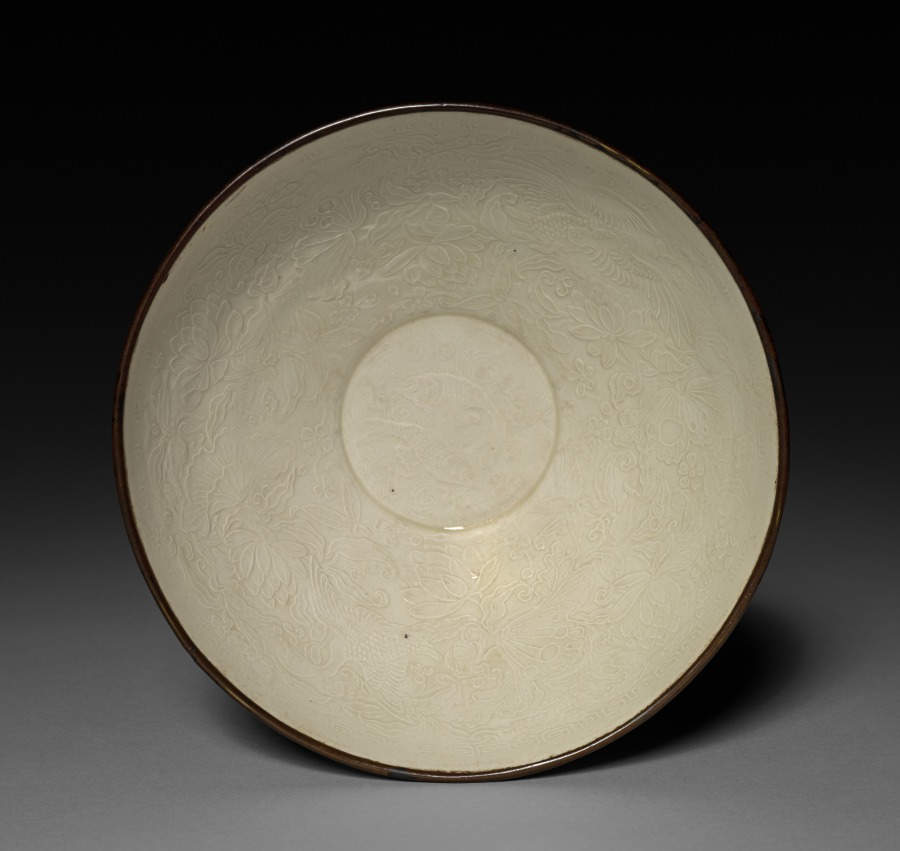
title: Bowl: Ding ware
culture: China, Jin dynasty (1115-1234)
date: 12th-13th Century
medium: glazed white porcelain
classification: Ceramic